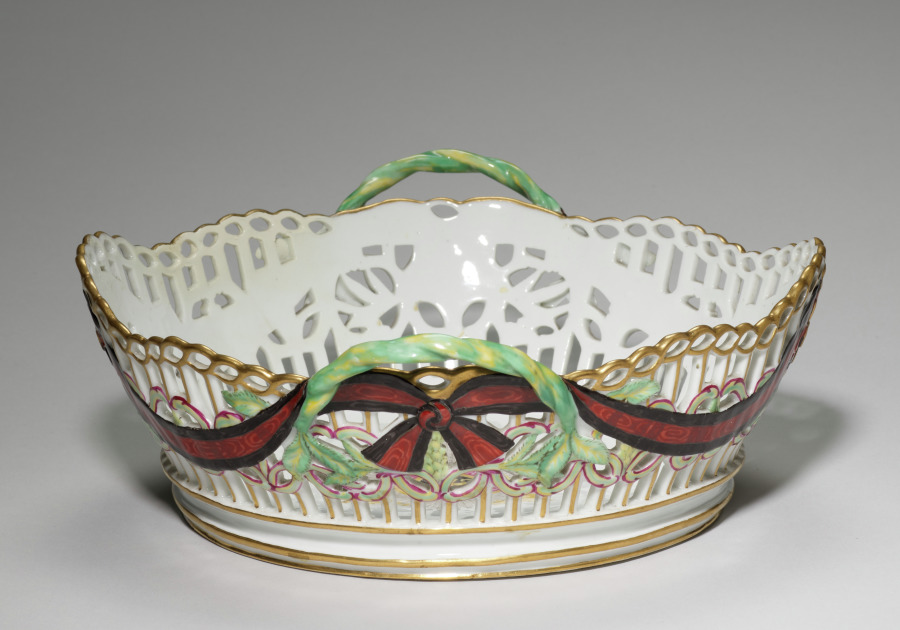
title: Fruit Basket (Corbeille)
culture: Russia, Moscow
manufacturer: Gardner Factory (Russian)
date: c. 1783–85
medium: porcelain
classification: Ceramic